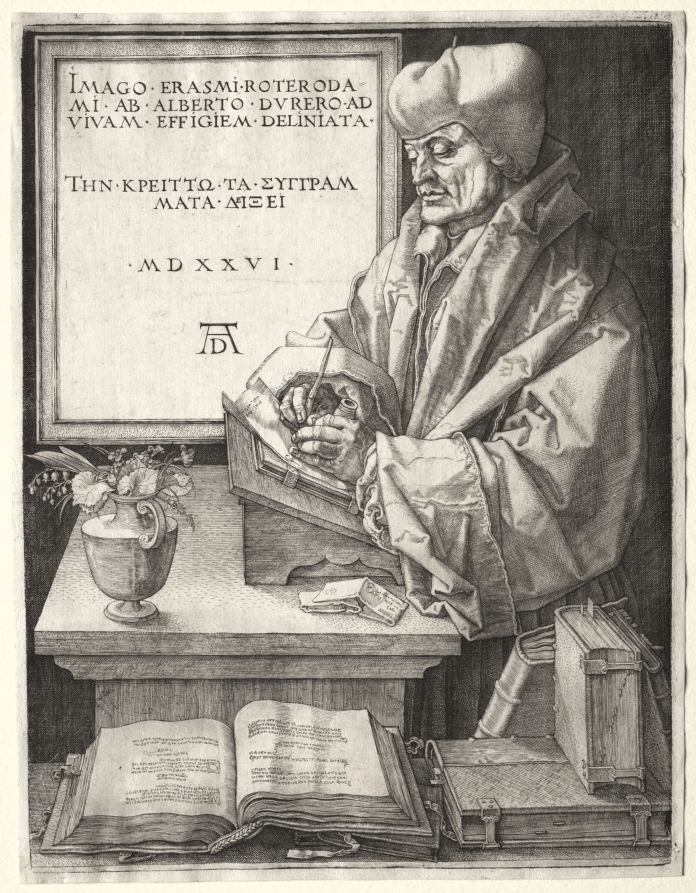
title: Desiderius Erasmus of Rotterdam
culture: Germany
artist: Albrecht Dürer (German, 1471–1528)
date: 1526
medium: engraving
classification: Print